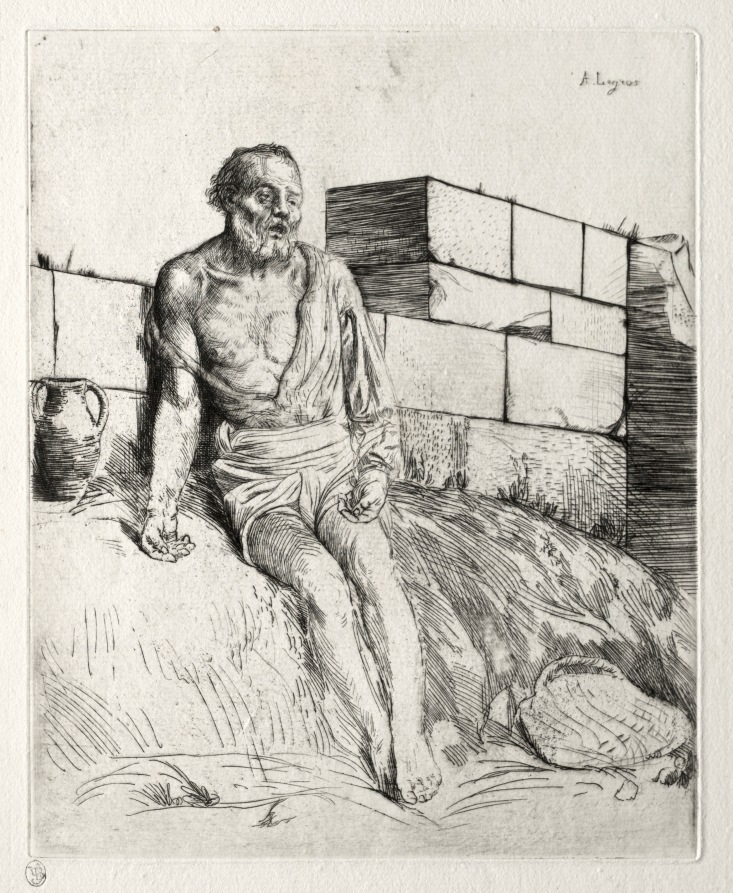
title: Job (First Plate)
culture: France, 19th-20th century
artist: Alphonse Legros (French, 1837–1911)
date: c. 1857–1911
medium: etching and drypoint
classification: Print